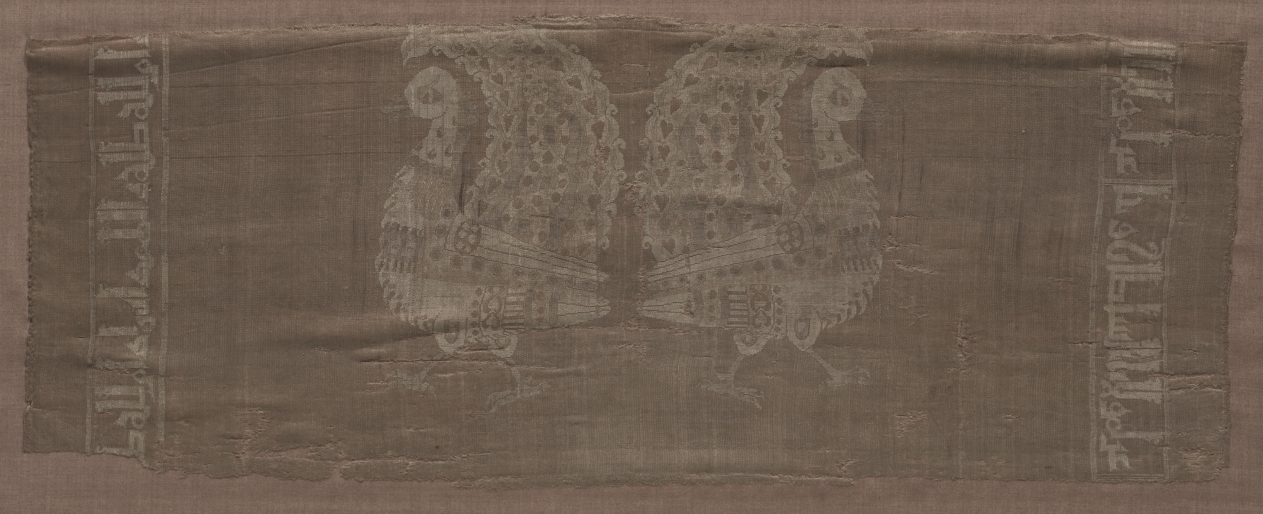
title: Fragment with peacocks and inscriptions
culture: Iran, in the style of the Buyid period (945–1055)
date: before 1968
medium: Silk: lampas weave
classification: Textile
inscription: on right: "Glory to our Master the [Sultan], Glory to our Master the Sultan and Caliph of the Merciful One, Baqir bin Shahrazad al-Hamadhani, may [God] prolong [his] shadow. Glory to our Master the Sultan and Ca[liph of . . .]"; inscription on left: ". . . al-Hamadhani, may [G]od prolong [his] shadow. Glory to our Master the Sultan and Caliph of the Mer[ciful One . . .]."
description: This textile fragment preserves a pair of addorsed peacocks in tan on a plain tan background with an inscription along the border.